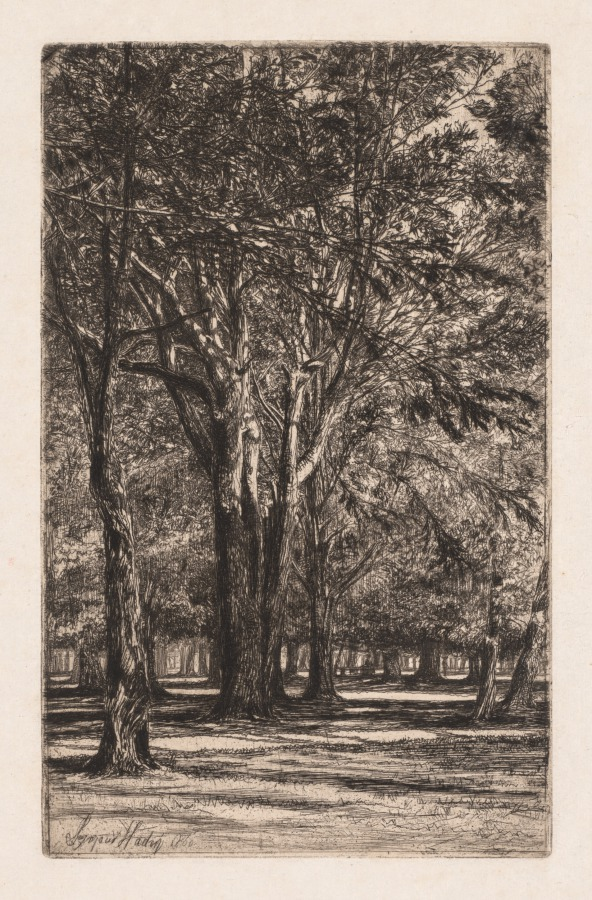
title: Kensington Gardens, No. 2 (The Larger Plate)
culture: Britain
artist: Francis Seymour Haden (British, 1818–1910)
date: 1860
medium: etching with drypoint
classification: Print